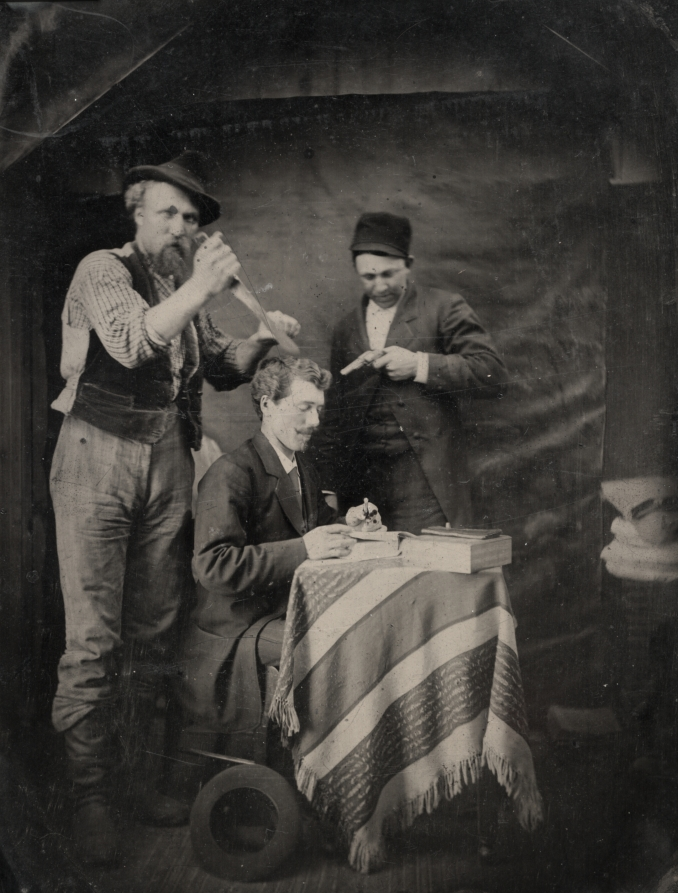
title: The Hold-Up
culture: American, 19th century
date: 1880s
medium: tintype, whole plate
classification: Photograph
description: Since the beginning of photography, objects and people have been purposefully arranged, or staged, for the camera. Popular in the late 1860s and 1870s, tintypes offered low prices and shortened exposure times. Perhaps because tintypists commonly worked at fairs and carnivals, frivolous images, such as this staged hold-up, became common. In these fictional scenes, all the participants were in on the joke. Some such scenes may be novelties, others may be gag portraits commissioned by groups of friends.